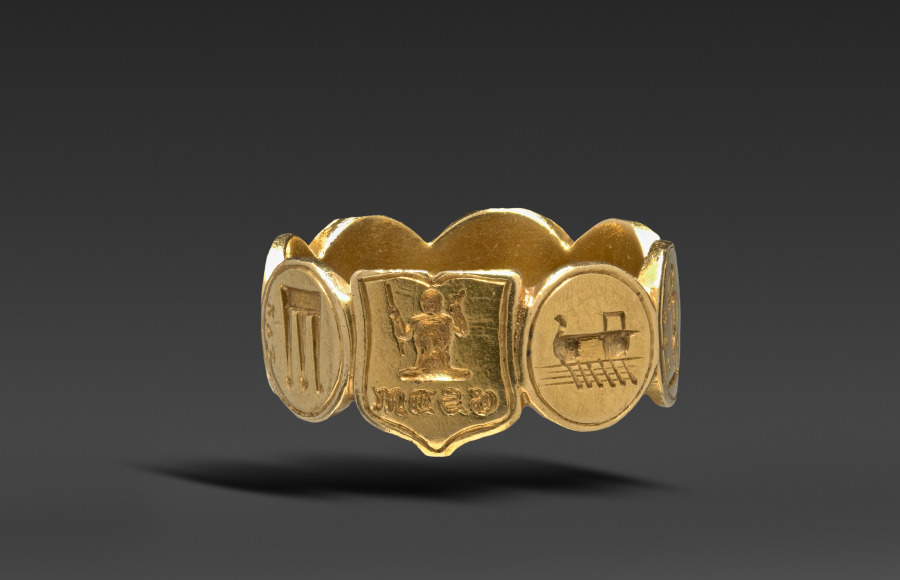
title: Signet Ring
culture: England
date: c. 1550–1600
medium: gold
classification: Jewelry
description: This type of multiple sided signet ring was popular in the later half of the 17th century.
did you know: When pressed into hot wax, a reverse image of the seal would be revealed.